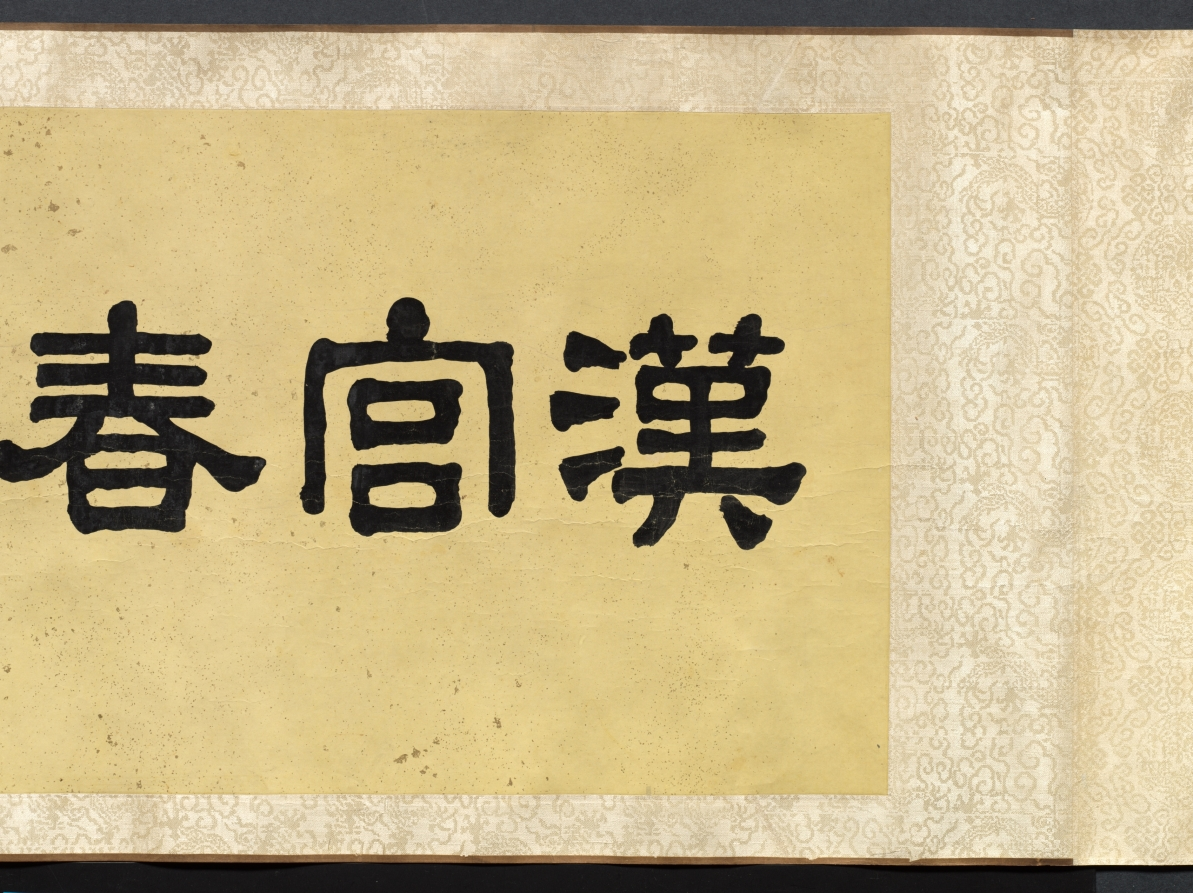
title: Palace Ladies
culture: China, Qing dynasty (1644-1911)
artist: copy after Qiu Ying (Chinese, 1494–1552)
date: 1644–1911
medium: handscroll, ink and color on silk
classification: Painting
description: This handscroll illustrates the pursuits of court ladies in a palace precinct on a spring day. Women, young girls, and their maids amuse themselves by sitting on a swing, playing games, watering and admiring peonies, performing music together, playing the qin (zither), feeding a parrot on the balustrade and fish in the water, or catching butterflies. The life of elite women was mostly restricted to the so-called inner quarters, meaning the garden and inner courts of the house. This painting idealizes the world of young palace girls that in fact was often filled with boredom and waiting for a lover.